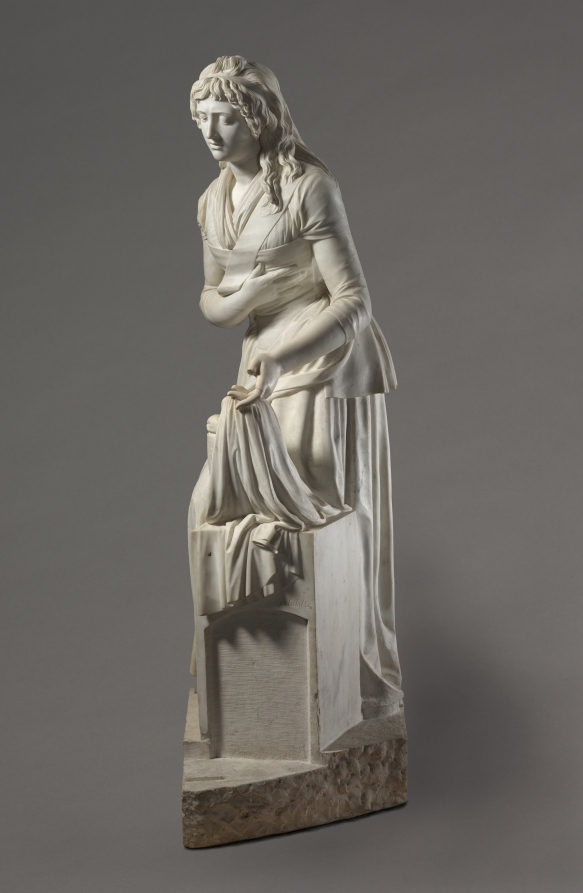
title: Funerary Monument for the Marquis de Tourney (for the Chapel of the Château de la Falaise)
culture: France, Paris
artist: François-Nicolas Delaistre (French, 1746–1832)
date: 1787–1793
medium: marble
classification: Sculpture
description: The Marquis Gallyot de Tourney commissioned this sculpture to serve as his funeral monument. It depicts a young woman gesturing with one hand toward an urn bearing the inscription Voilà ce coeur qui nous a tant aimé (Here is the heart that loved us so). The marquis specified that the figure should be a rosière, a virtuous woman of humble circumstances, a choice likely informed by the writings of Enlightenment philosophers, especially Jean-Jacques Rousseau, who championed greater social equality and democratic reform.